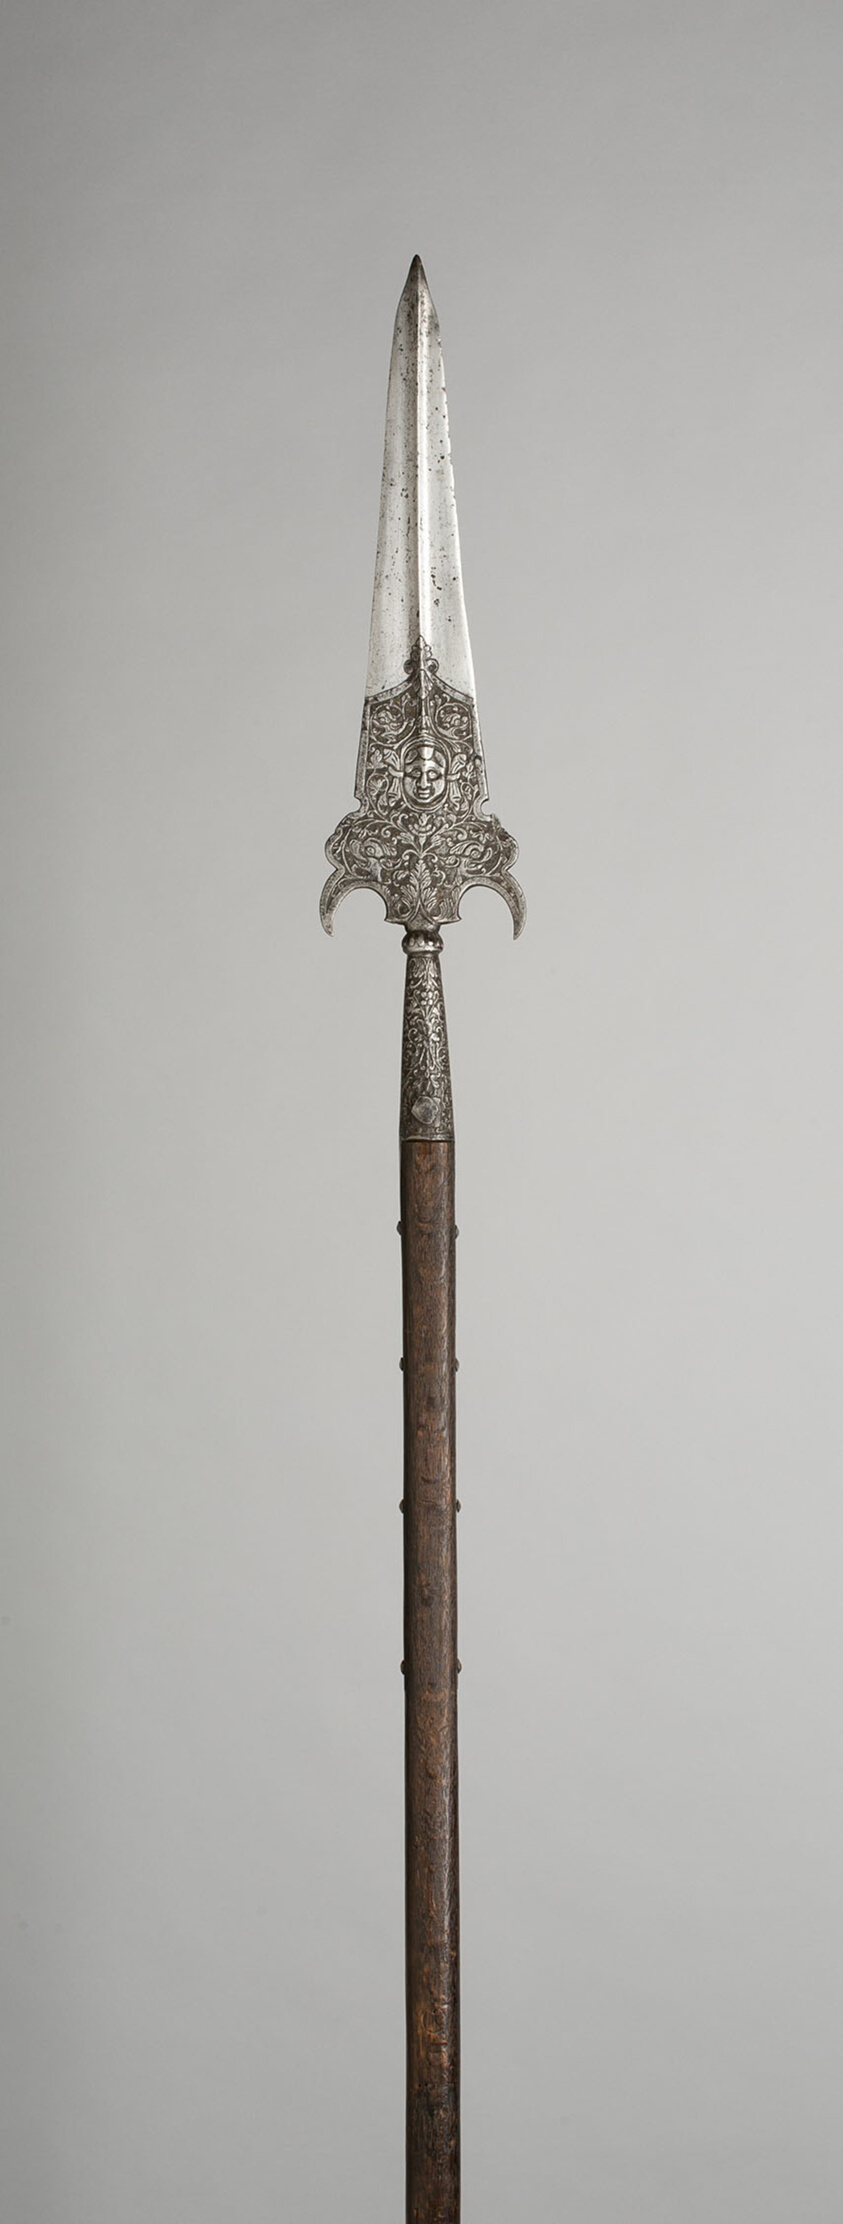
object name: Arms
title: Partisan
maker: French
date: early 17th century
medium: Steel, wood (oak), and iron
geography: France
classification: edged weapon-staff; arms; arms and armor